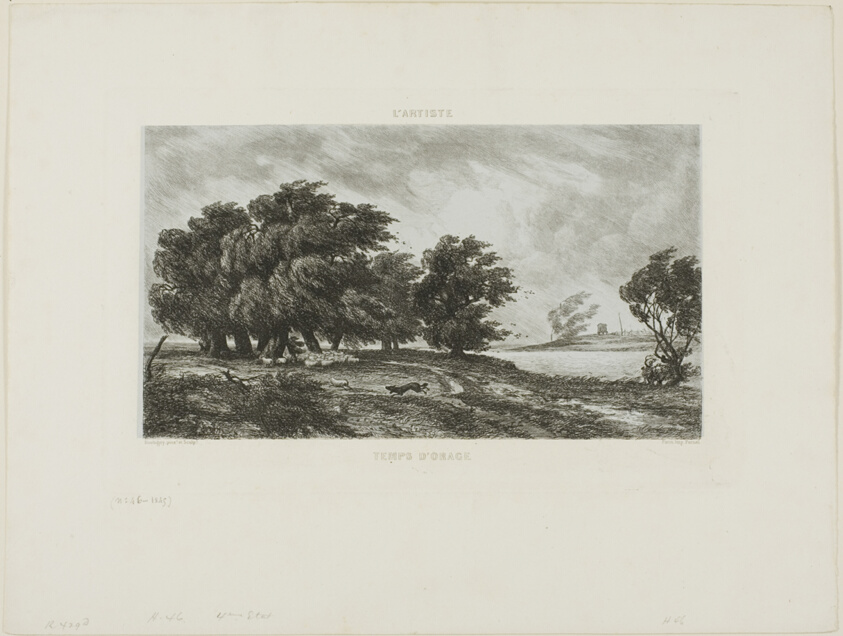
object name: Print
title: Stormy Weather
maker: Charles François Daubigny (French, 1817-1878)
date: 1845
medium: Etching on light blue chine laid down on white wove paper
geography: France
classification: etching; print; prints and drawing